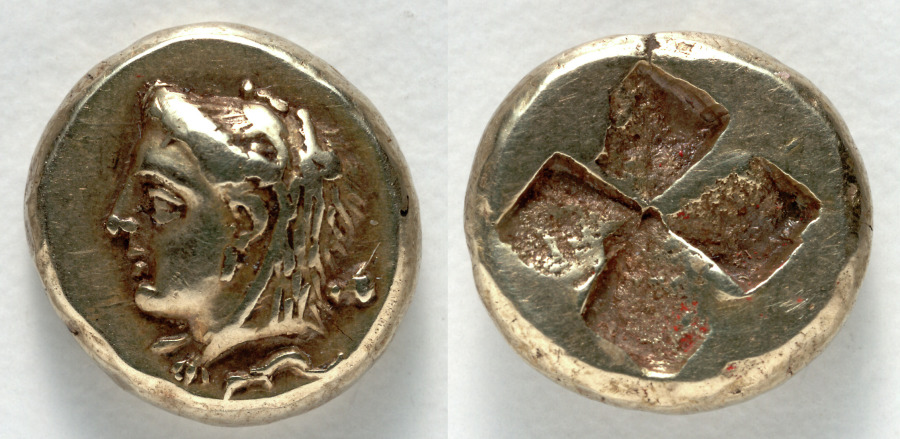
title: Hecte: Head of Omphale (obverse); Incuse Square (reverse)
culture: Greek, minted at Phokaia (Ionia)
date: 387–326 BCE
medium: electrum (gold-silver alloy)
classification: Coins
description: This very small electrum coin shows the Lydian queen Omphale on the obverse. She can be distinguished from Herakles, whose lion-skin she wears, by her earring. Also visible, over her shoulder, is the hero’s club, while beneath her swims a small seal—phôkê in Greek, a punning reference to Phokaia, where the coin was made. The reverse features a much simpler design, a quartered incuse square.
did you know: The Lydian queen Omphale wears the lion skin of Herakles, whom she enslaved.